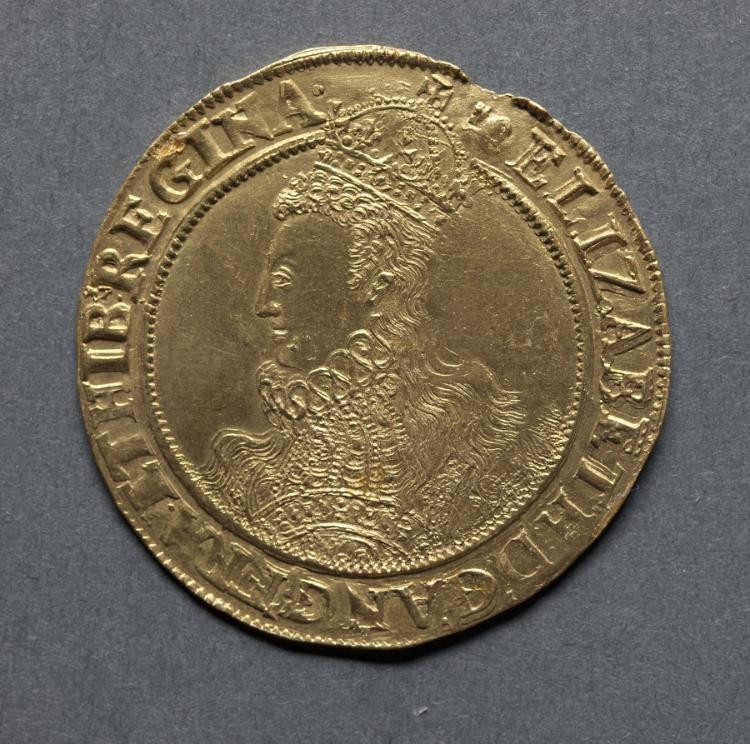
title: Pound: Elizabeth I (obverse)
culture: England, Elizabeth I, 1558-1603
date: 1595–1598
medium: gold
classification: Coins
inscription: ELIZABETH D G ANG FRA ET HIB REGINA